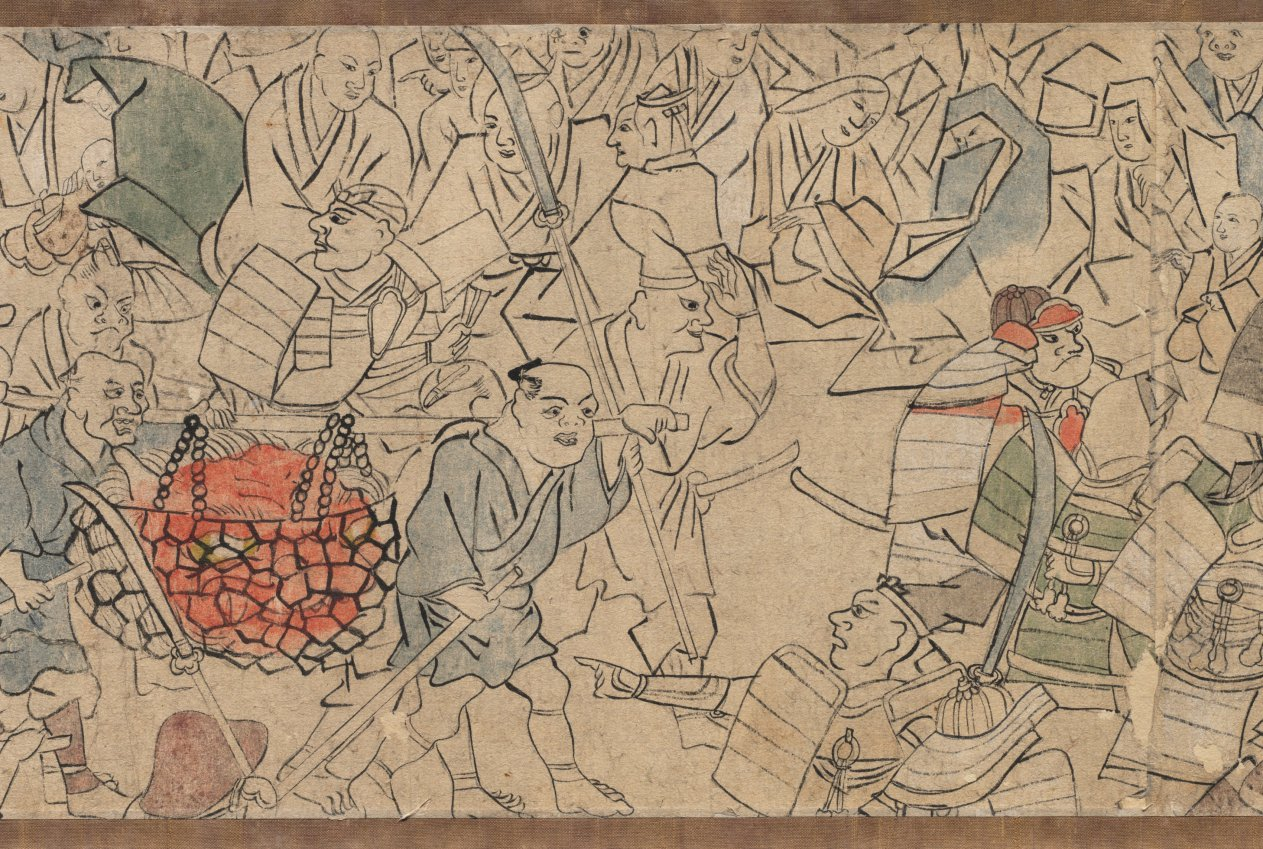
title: Oeyama Engi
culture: Japan, Edo period (1615–1868)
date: 1615–1868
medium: one of a pair of handscrolls; ink and color on paper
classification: Painting